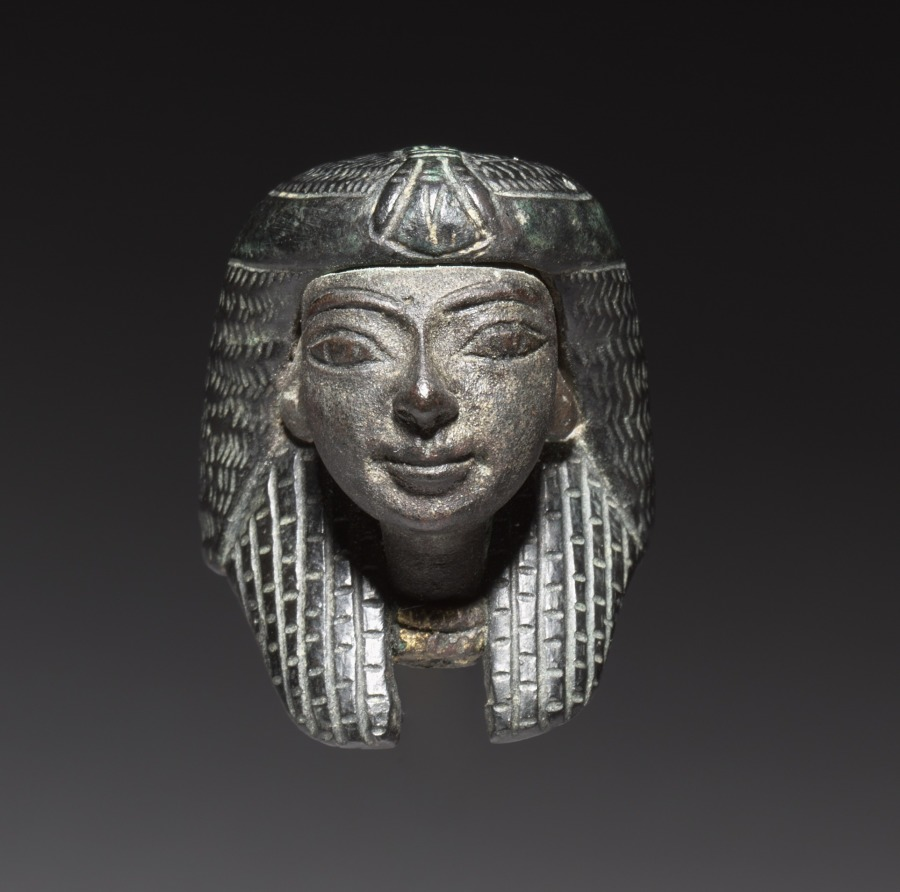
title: Bronze Mounts from a "Shawabty Bundle": Head, Arms, and Feet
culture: Egypt, Thebes, Wadi Qubbanet el-Qirud, New Kingdom (1540–1069 BCE), Dynasties 18–19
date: c. 1336–1256 BCE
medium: bronze, black copper wig, traces of gilding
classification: Funerary Equipment